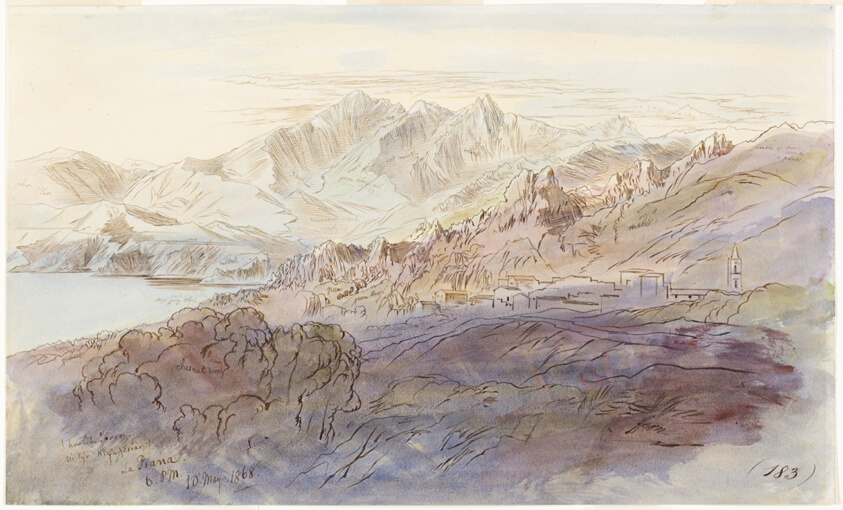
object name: Drawing and Watercolor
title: La Piana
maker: Edward Lear (English, 1812-1888)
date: 1868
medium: Watercolor and pen and brush and brown ink, over graphite, on ivory wove paper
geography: England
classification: watercolor; drawings (visual works); prints and drawing